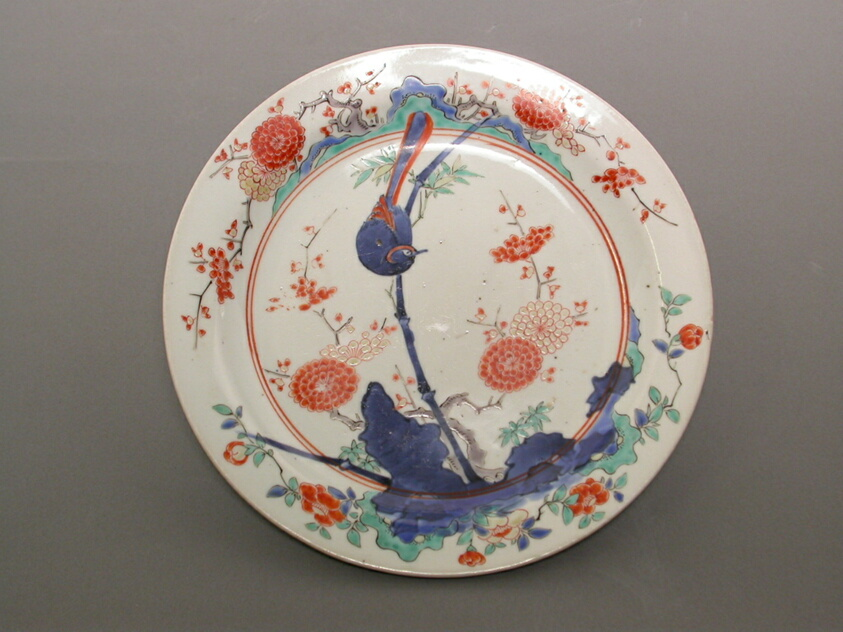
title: Arita ware dish, Kakiemon style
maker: Artist unknown (Japanese, active 18th century)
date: 18th century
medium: Porcelain with overglaze polychrome enamel decoration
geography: Japan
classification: porcelain; ceramics; asian art